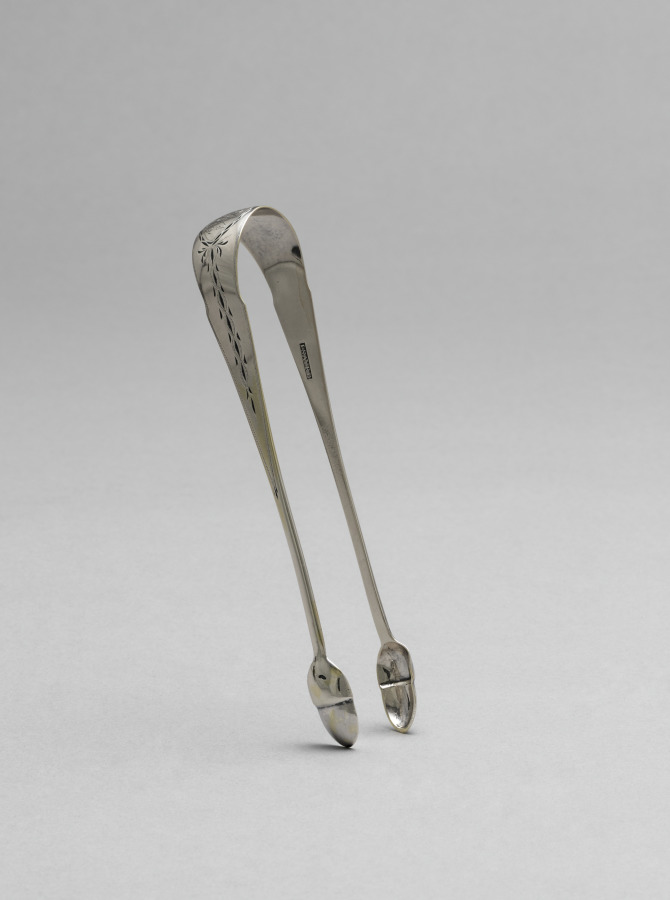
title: Sugar Tongs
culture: America, New York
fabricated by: John Sayre (American, 1771–1852)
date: c. 1800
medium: silver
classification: Silver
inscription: engraved "BMH" in bright-cut script within reserve on bow.